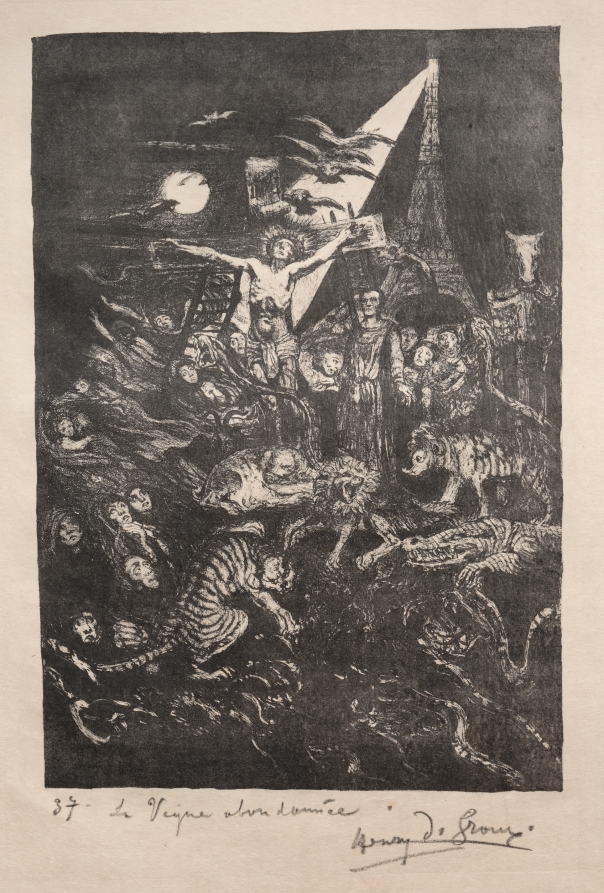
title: The Vintages!: The Abandoned Vine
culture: Belgium, 19th century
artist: Henri de Groux (Belgian, 1867–1930)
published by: Proof from an unpublished suite of lithographs intended to be published by L'Estampe Originale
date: 1894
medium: lithograph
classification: Print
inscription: lower right, in lithographic crayon: Henri De Groux; lower left, in lithographic crayon: 37 La Vigne abondonnee.